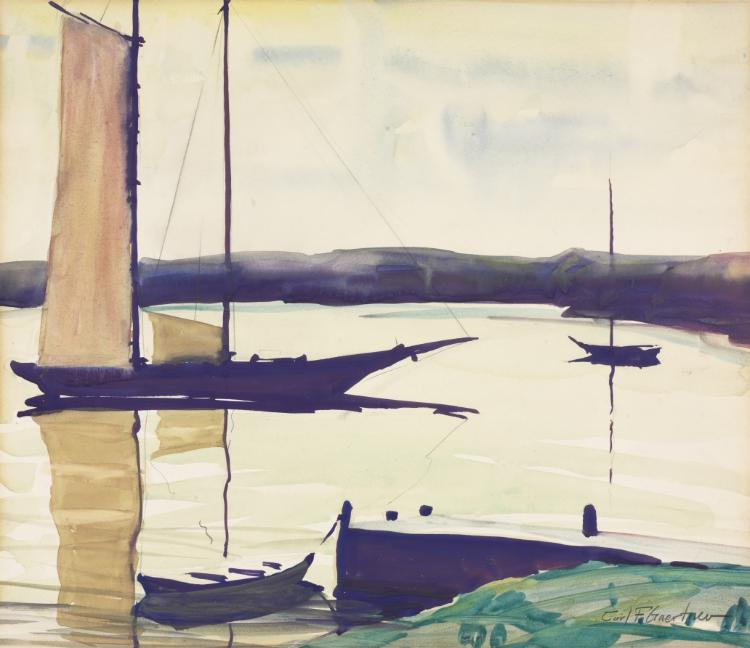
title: The Harbor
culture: America, Ohio, Cleveland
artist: Carl Gaertner (American, 1898–1952)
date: c. 1925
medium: watercolor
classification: Drawing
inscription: In graphite, recto, lower right: "Carl F. Gaertner (signed)"